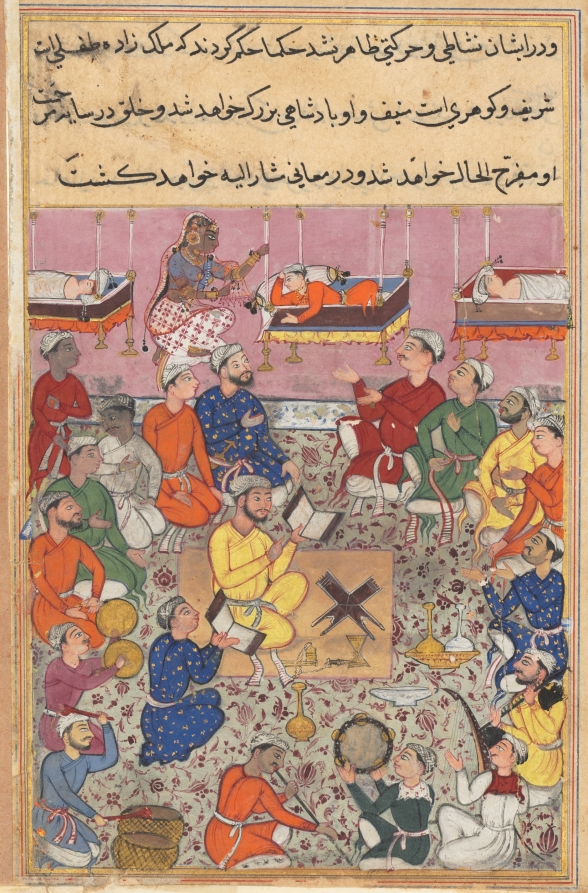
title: The infant son of the king of Isfahan responds to music, from a Tuti-nama (Tales of a Parrot): Thirteenth Night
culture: Mughal India, court of Akbar (reigned 1556–1605)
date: c. 1560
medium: gum tempera, ink, and gold on paper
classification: Painting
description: A group of musicians play a variety of instruments in hopes of eliciting a reaction from the young prince. The prince, dressed in orange, sits up in his crib to acknowledge the sound while the other children remain asleep. His eager response to the music shows that he is a noble child who will become a great king.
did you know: The instruments played include a tambourine, drum, and cymbals.